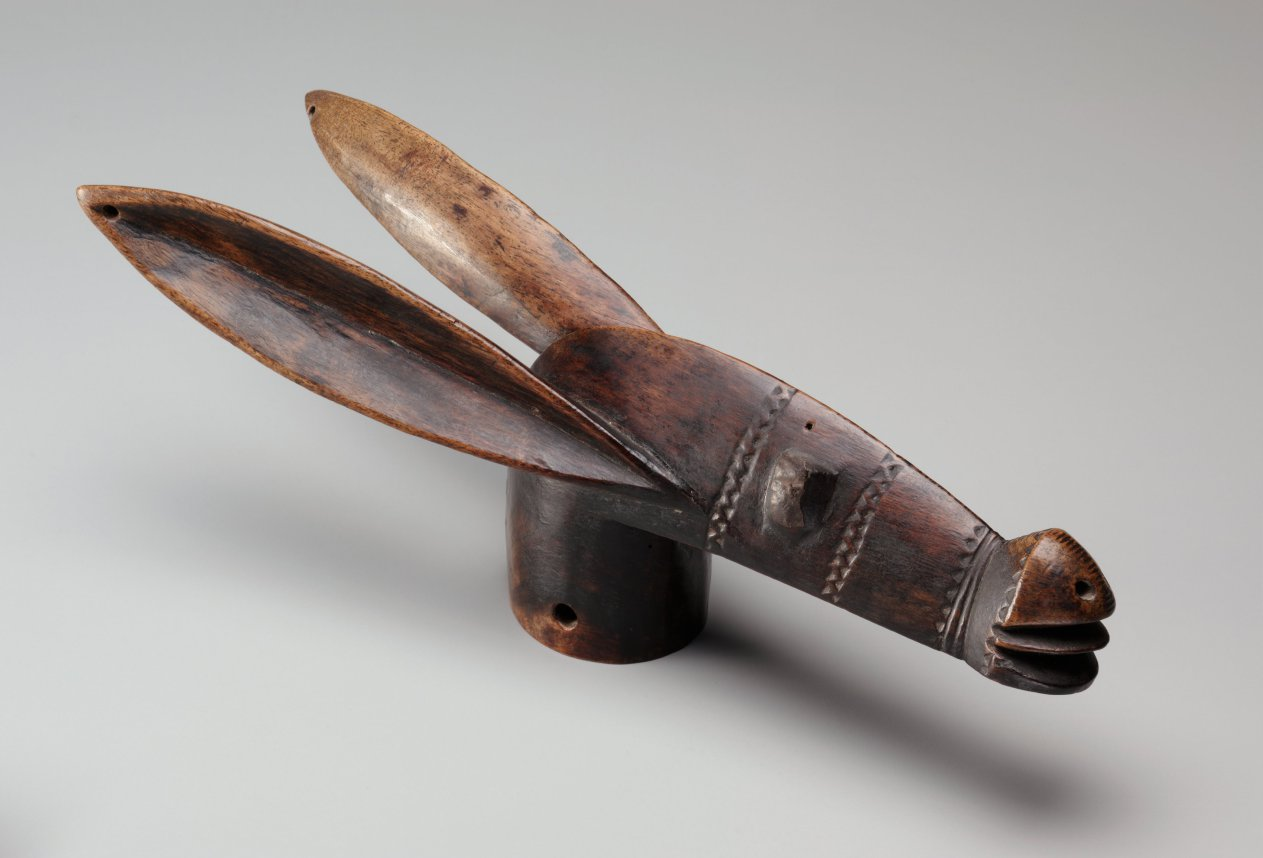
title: Head of a Hobbyhorse (korèdugaso)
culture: Africa, West Africa, Mali, Bamana blacksmith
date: late 1800s–early 1900s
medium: Wood and iron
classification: Sculpture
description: Pertaining to the male initiation society called Korè, this sculpture from the Koulikoro region represents the head of an aardvark and is part of a wooden hobbyhorse that is mounted by a ritual buffoon. The Korè initiates are divided into different classes, each having a designated mask. The ritual buffoons appear in pantomimes on different public occasions and poke fun at village authorities and other high-ranking individuals.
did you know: This is one of the best-known examples of a korèdugaso. It was featured on the catalogue cover for a 1935 exhibition at the Museum of Modern Art, one of the first on African arts in the US. It traveled to the CMA that same year.